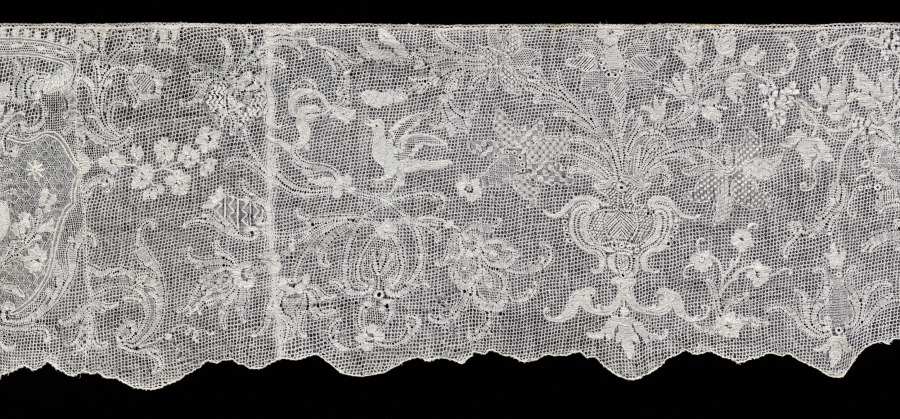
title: Lace Flounce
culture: Belgium, Dinant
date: 1700s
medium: Linen: needle lace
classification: Lace